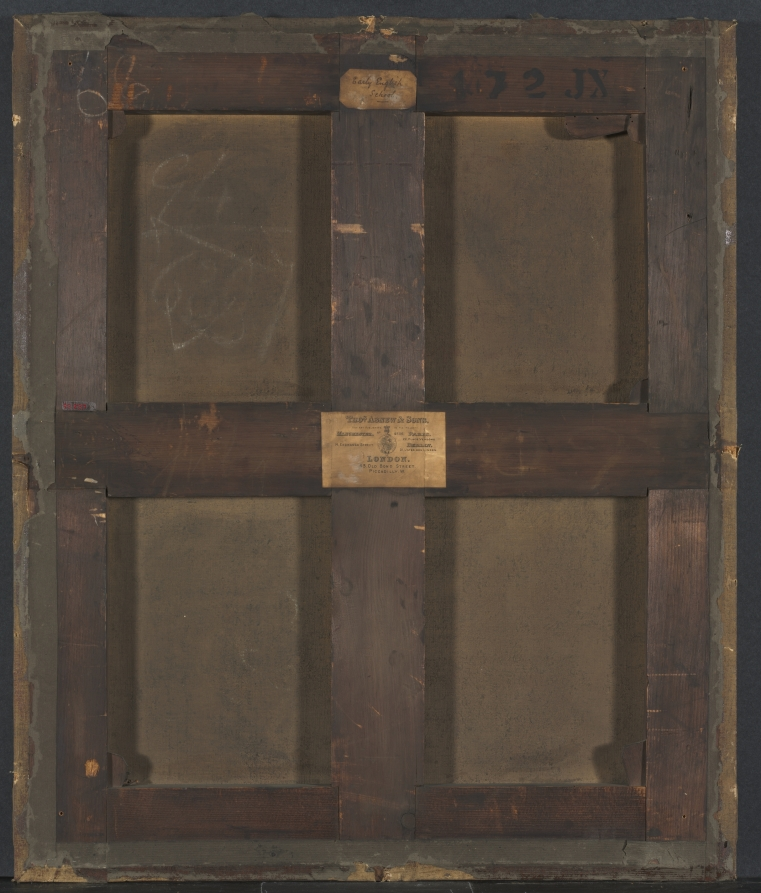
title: Portrait of a Man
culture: England, 18th century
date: c. 1730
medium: oil on canvas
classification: Painting